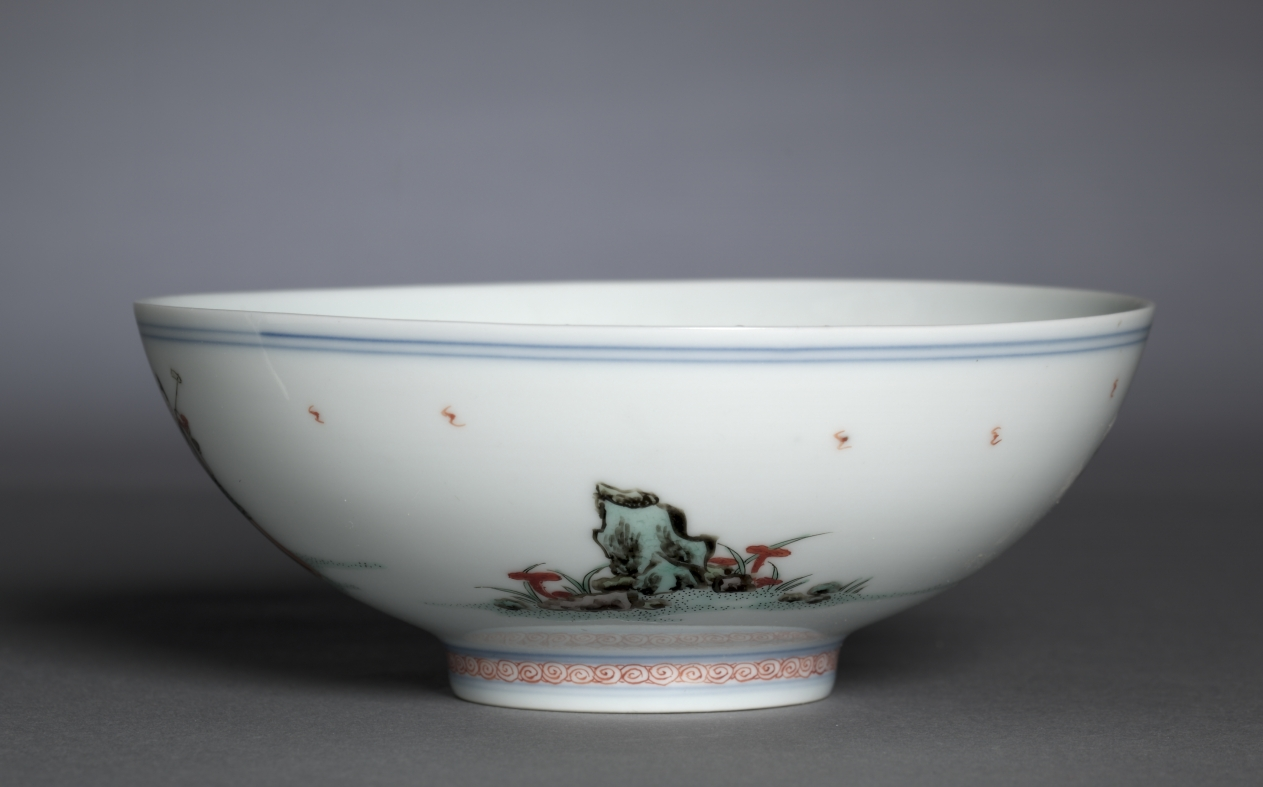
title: Bowl with Xiwangmu and Attendants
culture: China, Jiangxi province, Jingdezhen, Qing dynasty (1644-1911), Kangxi reign (1662-1722), but Chenghua mark (1465-87)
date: 1662–1722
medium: porcelain with famille verte overglaze enamel decoration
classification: Ceramic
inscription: 大明成化年製